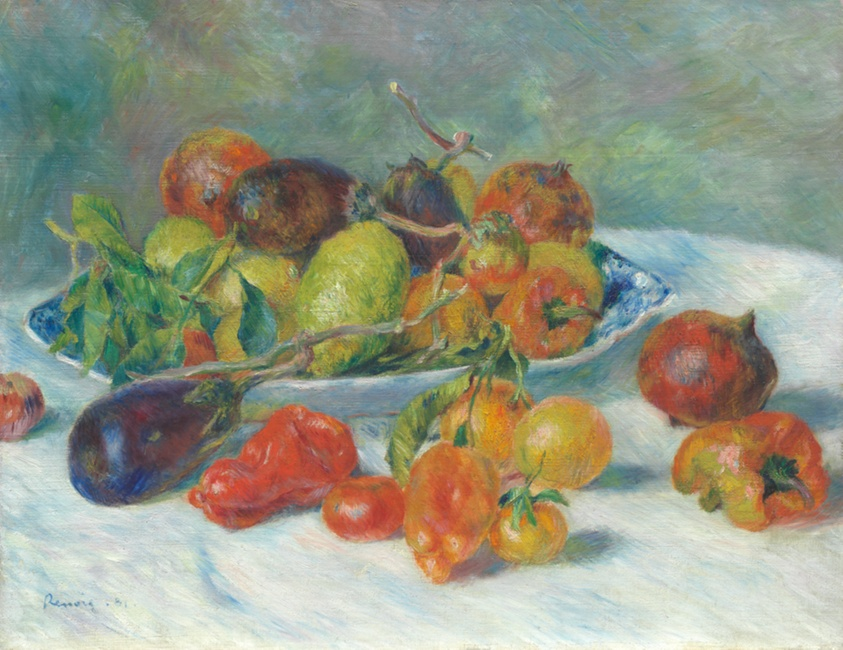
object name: Painting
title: Fruits of the Midi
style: Impressionism, nineteenth century, 19th century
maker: Pierre-Auguste Renoir (French, 1841–1919)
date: 1881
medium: Oil on canvas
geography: France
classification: painting; still life; paint; oil paintings (visual works); oil on canvas; french; european painting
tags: still life, white (color), tablecloth, table, pomegranates, peppers, leaves, leaf, bowl, food, Century of Progress, world's fairs, Chicago World's Fairs